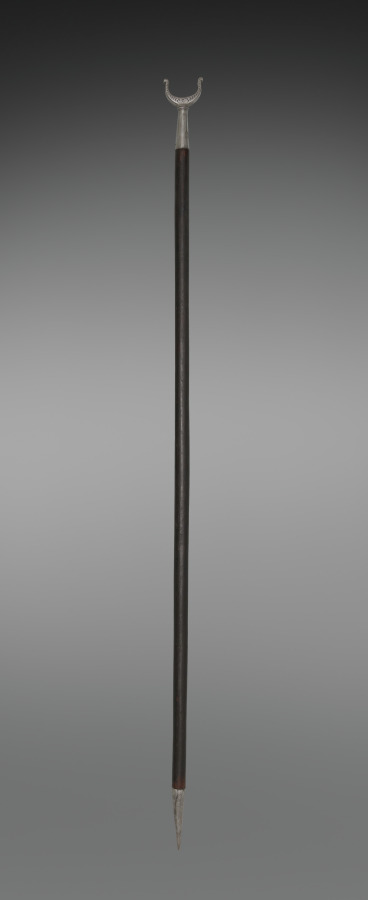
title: Gun Rest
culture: Italy, 17th century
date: 1600s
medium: steel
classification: Arms and Armor